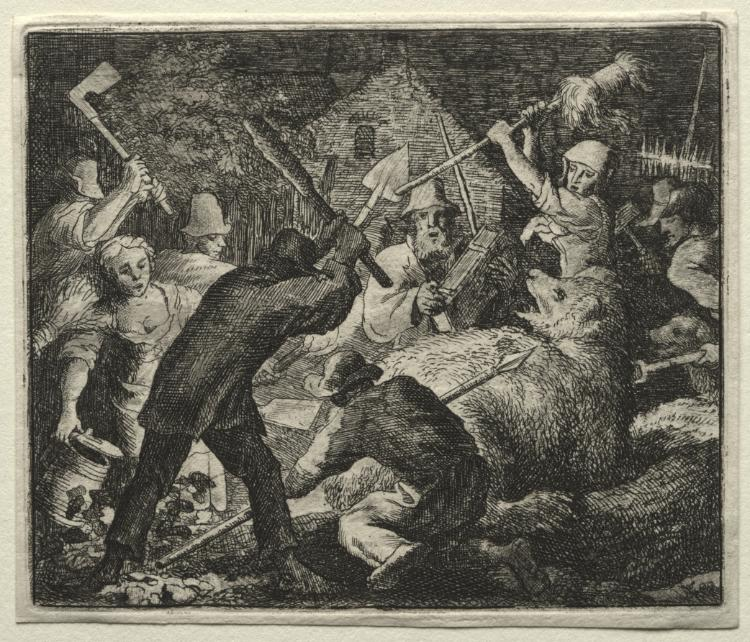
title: Reynard the Fox: Peasants Attack the Bear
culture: Netherlands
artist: Allart van Everdingen (Dutch, 1621–1675)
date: 1650–75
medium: etching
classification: Print